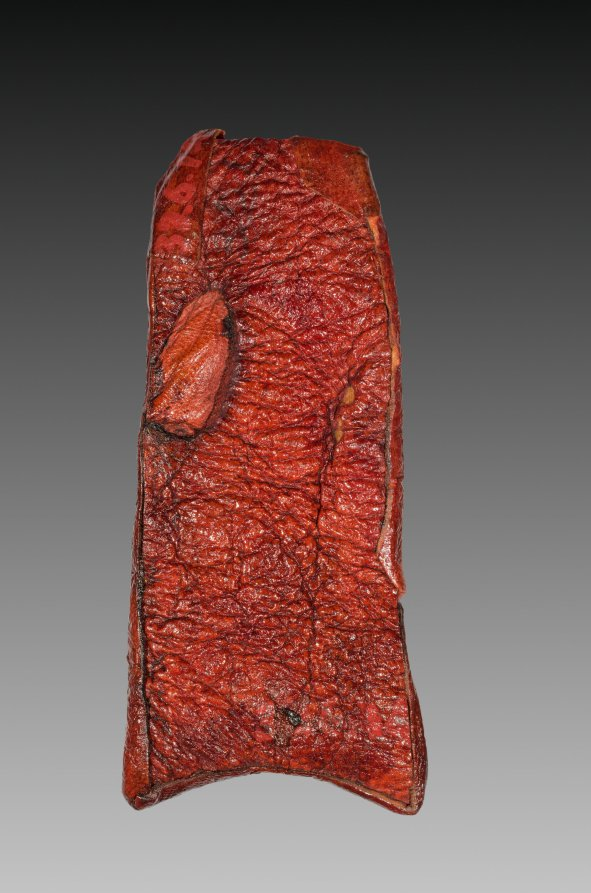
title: Tab from Mummy Band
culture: Egypt, Third Intermediate (1069–715 BCE), Dynasty 22, reign of Osorkon I (992–887 BCE)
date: 945–715 BCE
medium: stained leather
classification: Funerary Equipment